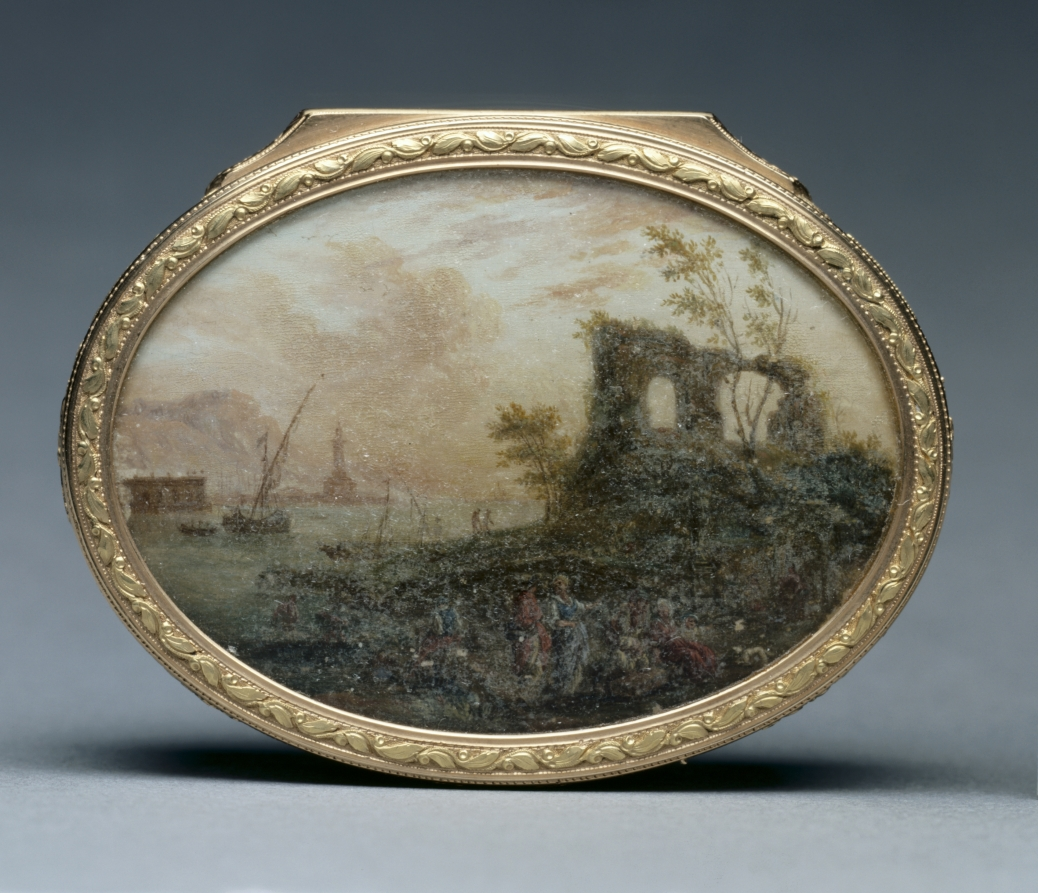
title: Snuff Box (Tabatière)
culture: France, 18th century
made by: Pierre-Nicholas Pleyard (French)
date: 1768–69; 1776–78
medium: gouache miniatures mounted on gold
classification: Metalwork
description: Snuff boxes were highly ornamented functional objects popular among French social elites. They were simultaneously containers for powdered tobacco and a means to communicate social and political status. Often decorated with miniature paintings inspired by popular paintings of the time, the works reproduced on this box are modeled after those of Claude-Joseph Vernet (cover and front panel) and David Teniers the Younger (base, side, and back panels).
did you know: These miniature paintings are mounted à cage, a practice popular in the mid-1700s that involved setting decorated panels into gold frames to create a box’s walls.